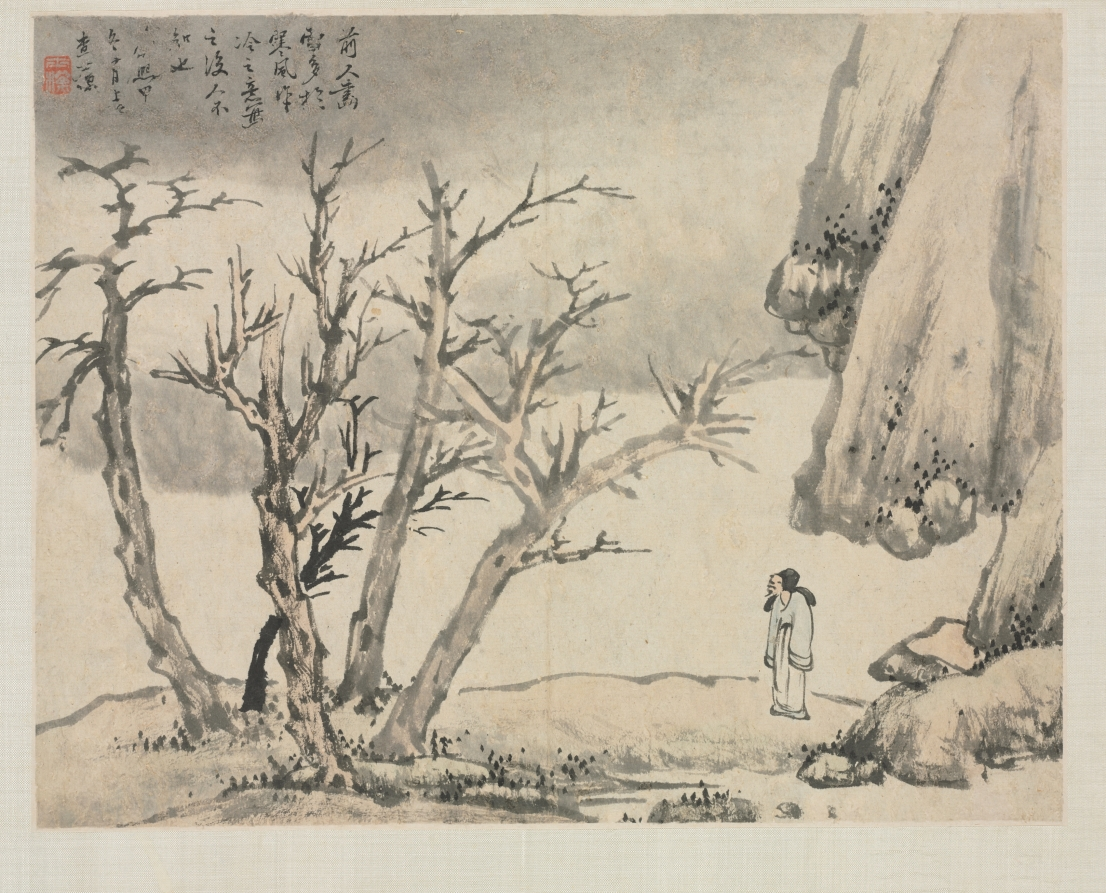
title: Landscape Album in Various Styles: Snowy Landscape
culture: China, Qing dynasty (1644-1911)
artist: Zha Shibiao (Chinese, 1615–1698)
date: 1684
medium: album leaf, ink and light color on paper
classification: Painting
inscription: Artist's inscription, signature, and seal: The ancients, when painting snow always emphasized the chilly wind to depict the coldness. Recent painters have not realized this. Kangxi era, jaizi 甲子 year [1684], winter, the tenth month. Zha Shibiao [seal] Shibiao.